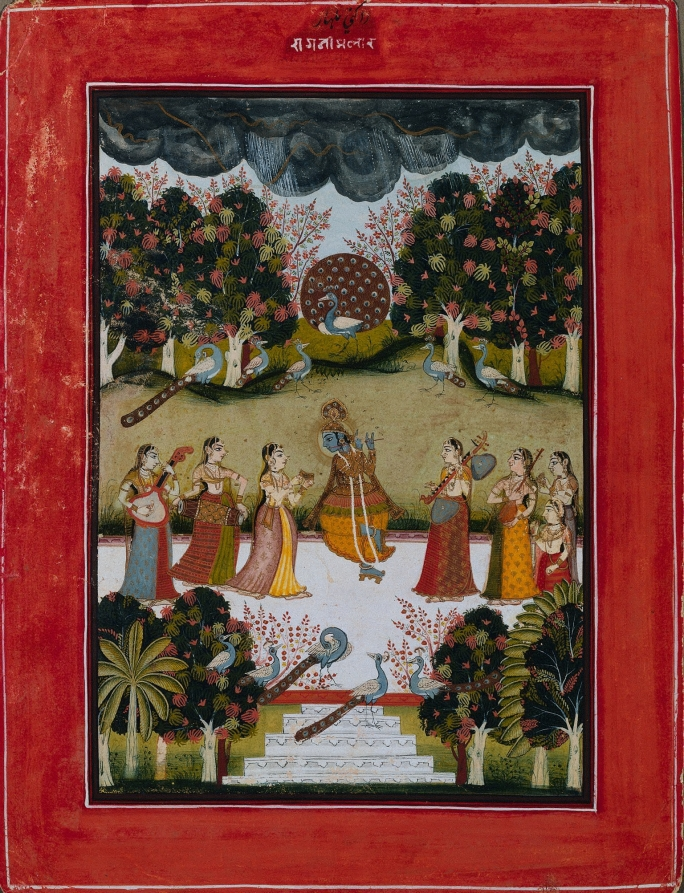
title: Malar Ragini: Krishna Playing the Flute to Seven Gopis Holding Musical Instruments, from the Ragamala Series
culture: India, Rajasthan, Bundi-Kota, 18th century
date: c. 1760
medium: color with gold and silver on paper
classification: Painting